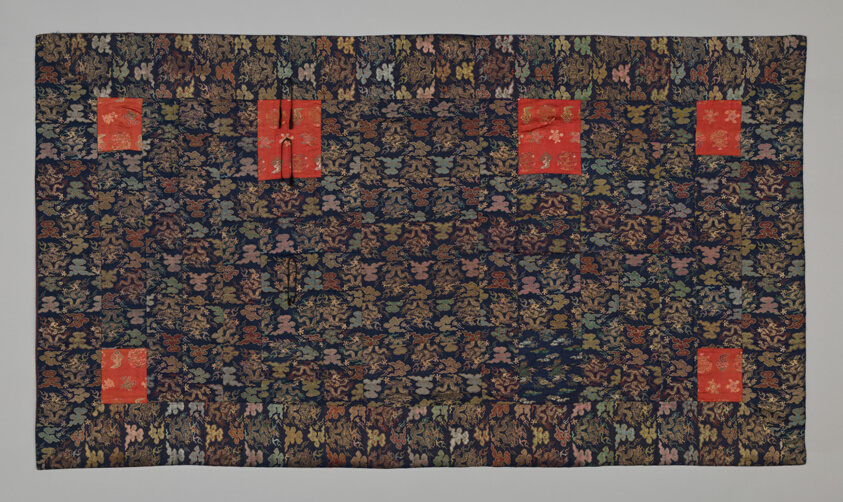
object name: Textile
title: Kesa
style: edo (japanese period)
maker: Japan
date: Edo period (1615–1868), late 18th century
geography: Japan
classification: textile; costume; liturgical - buddhist; weaving